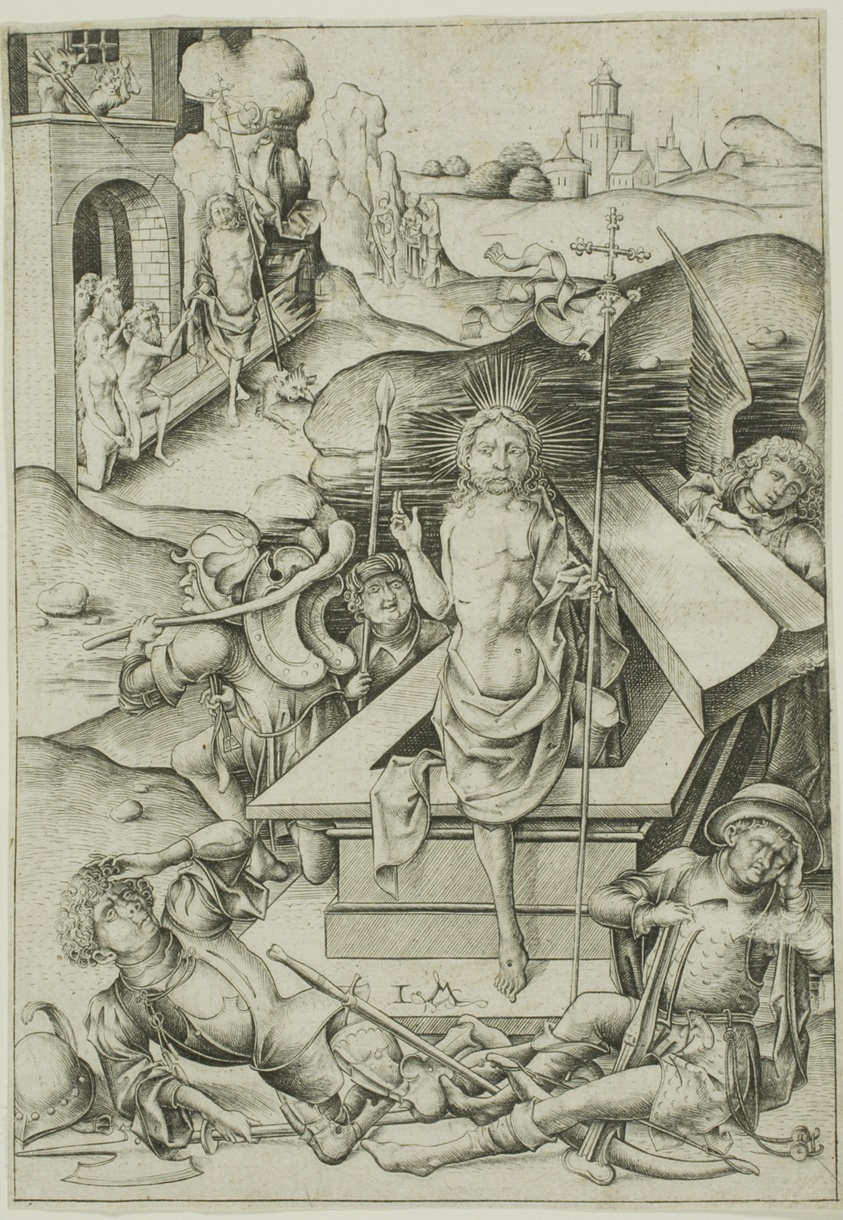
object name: Print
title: The Resurrection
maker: Israhel van Meckenem the Younger; German, c. 1440/45-1503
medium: Engraving on ivory laid paper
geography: Germany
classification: engraving; print; prints and drawing